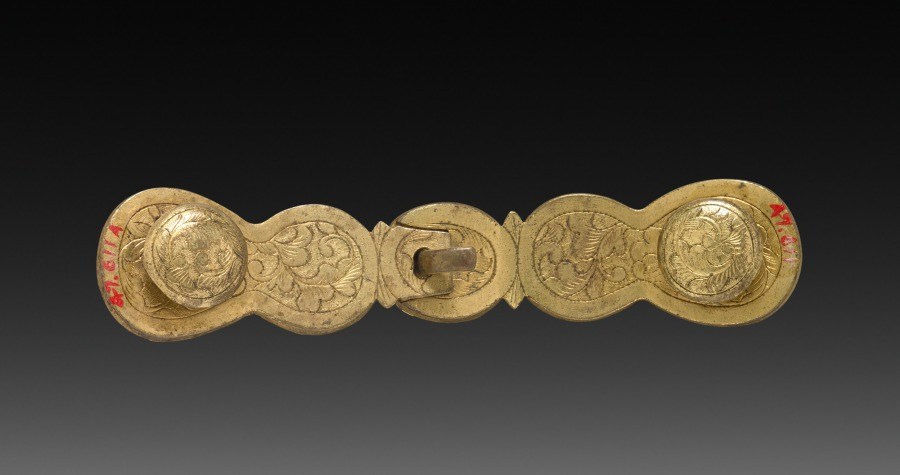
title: Buckle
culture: China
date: 1900s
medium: engraved brass, semi-precious stones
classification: Jewelry